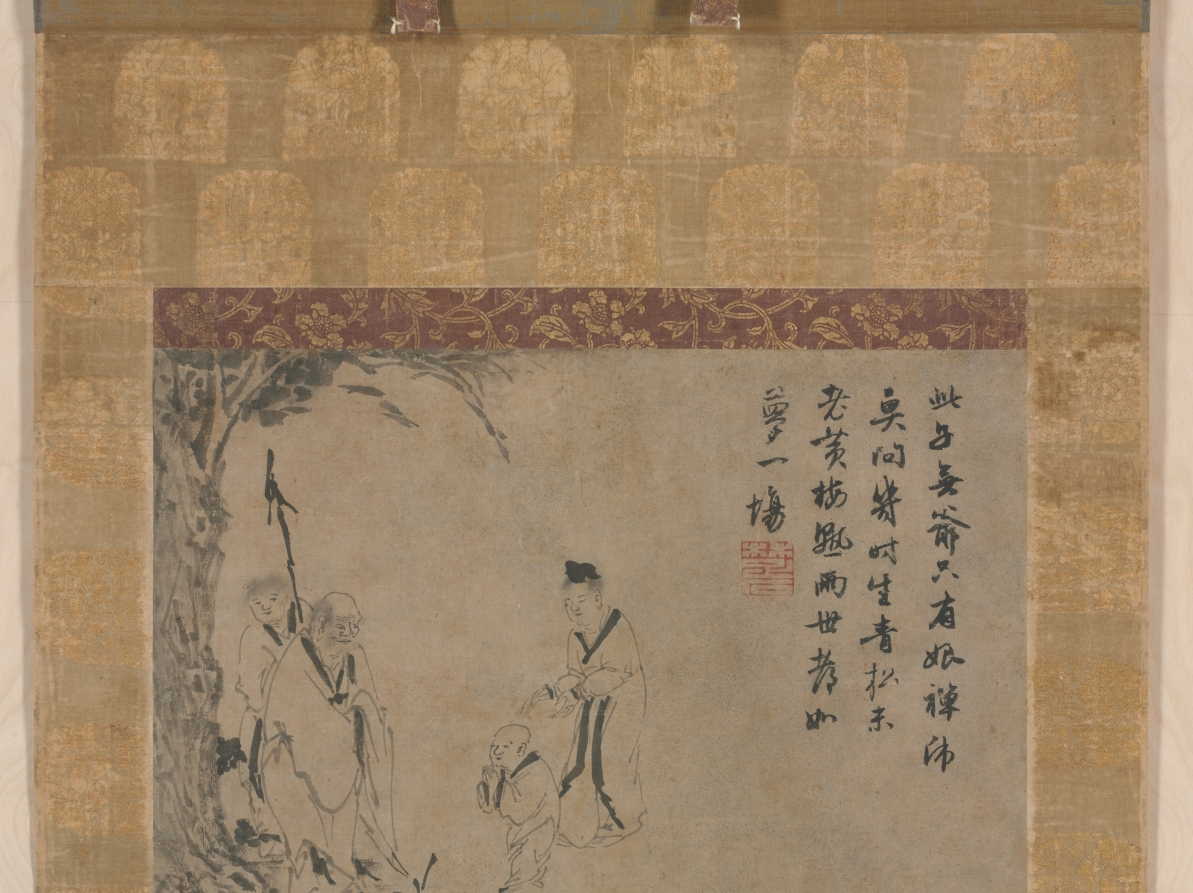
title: The Second Coming of the Fifth Patriarch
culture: China, Yuan dynasty (1271-1368)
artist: Yintuoluo (Chinese, c. 1285-c. 1355)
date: c. mid-1300s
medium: section of a handscroll mounted as a hanging scroll, ink on paper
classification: Painting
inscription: [印] 人言洞裡桃花源，未必人間有此枝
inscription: 此子無爺只有娘，禪師莫問幾時生。 青松未老黃梅飄，兩世都如夢一場。 [印] 楚石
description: A small boy, accompanied by his mother, is closing his hands in greeting to an old monk who has a young attendant standing behind him. Scholars believe the scene is a meeting between the fourth patriarch of Chan Buddhism, Daoxin 道信, and the little boy, who was the reincarnation of an old monk named Zaisong daozhe 栽松道者 (Pine Planter). They had encountered before, during which Daoxin advised the Pine Planter to endure a reincarnation as he was too old to reach enlightenment. This painting is done by Yintuoluo, an artist renowned for his simple and unadorned style.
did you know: This painting is just a section of a handscroll that has been remounted as a hanging scroll.